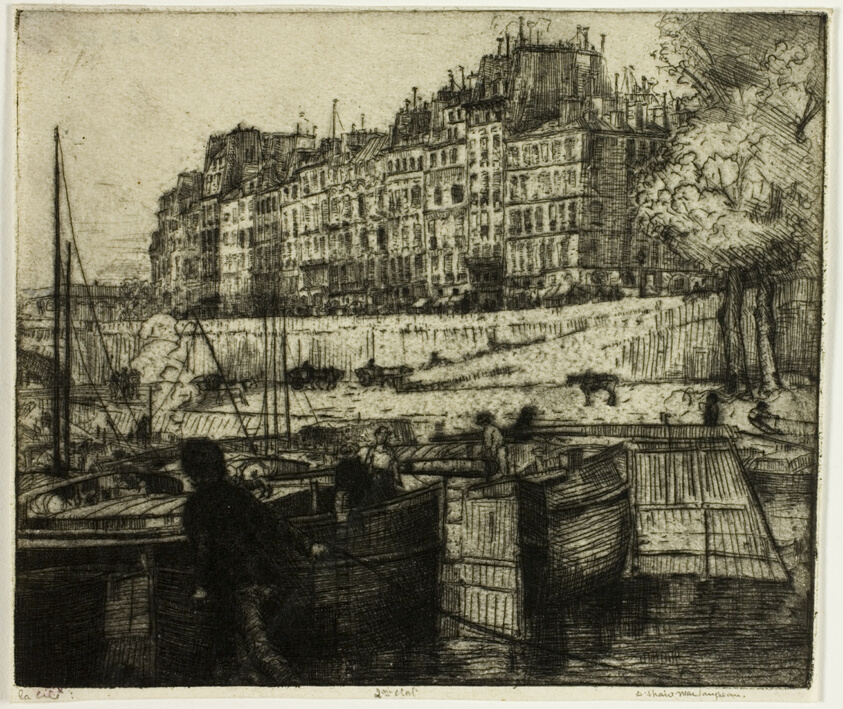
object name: Print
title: La Cité, Paris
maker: Donald Shaw MacLaughlan (American, born Canada, 1876-1938)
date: 1900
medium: Etching in black on cream wove paper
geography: United States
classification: etching; print; prints and drawing